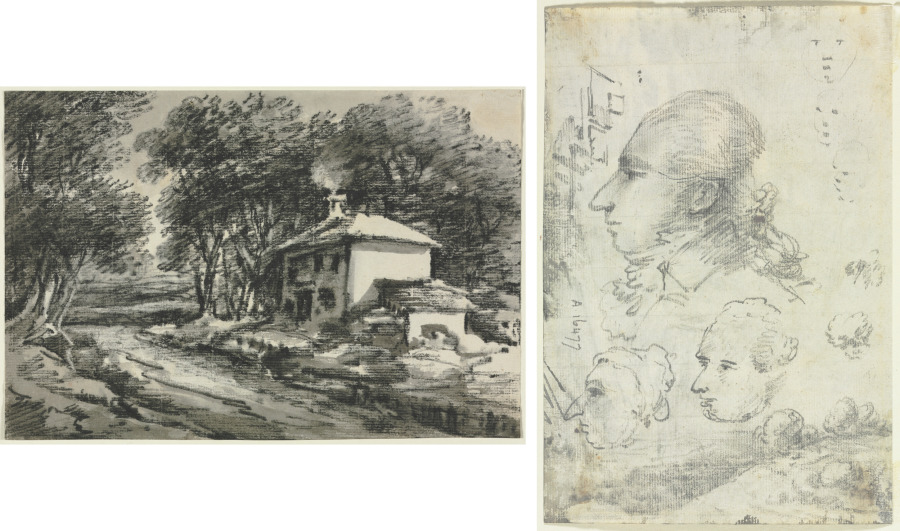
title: Landscape with Cottage (recto); Studies of Heads (verso)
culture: England, 18th century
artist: Thomas Monro (British, 1759–1833)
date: c. 1820s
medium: black chalk and gray wash with scraping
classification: Drawing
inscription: verso, in graphite: A 16477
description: Dr. Thomas Monro is best known as a patron who exercised significant influence in the London art world in the late 18th and early 19th centuries, but he was also an amateur artist and competent follower of Thomas Gainsborough. The physician’s drawings were monochromatic, done in wash with additions of charcoal, chalk, or india ink in emulation of Gainsborough’s moody rural views. On the verso of the drawing is a mise-en-page of caricatures and a hillside—perhaps whimsically drawn by multiple artists at one of the doctor’s salons.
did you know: Dr. Thomas Monro established what became known as an "Academy," where artists gathered in the evenings to draw, at his home overlooking the Thames.